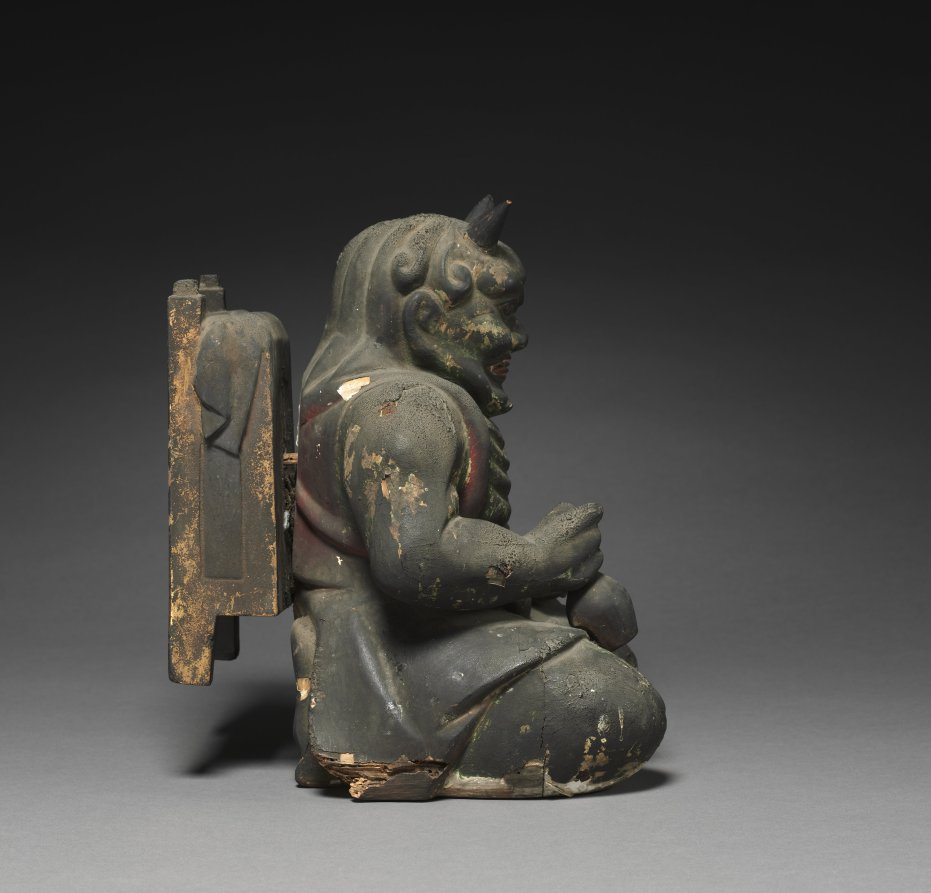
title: Seated Koki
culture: Japan, Muromachi period (1392–1573)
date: 1400s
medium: wood with pigment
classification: Sculpture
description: The axe-wielding red Zenki, and the vase-holding, bamboo backpack-wearing green Koki are both under the mystical control of the monk, En no Ozunu (legendarily 634–701), also known as En no Gyōja, or “En the Ascetic,” considered to have founded Shugendō, a style of religious practice focused on performing austerities in mountainous settings.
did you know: This sculpture was hand-carved and covered with gesso, then paint in green, white, red, yellow, orange, and black, and gilded in select areas.